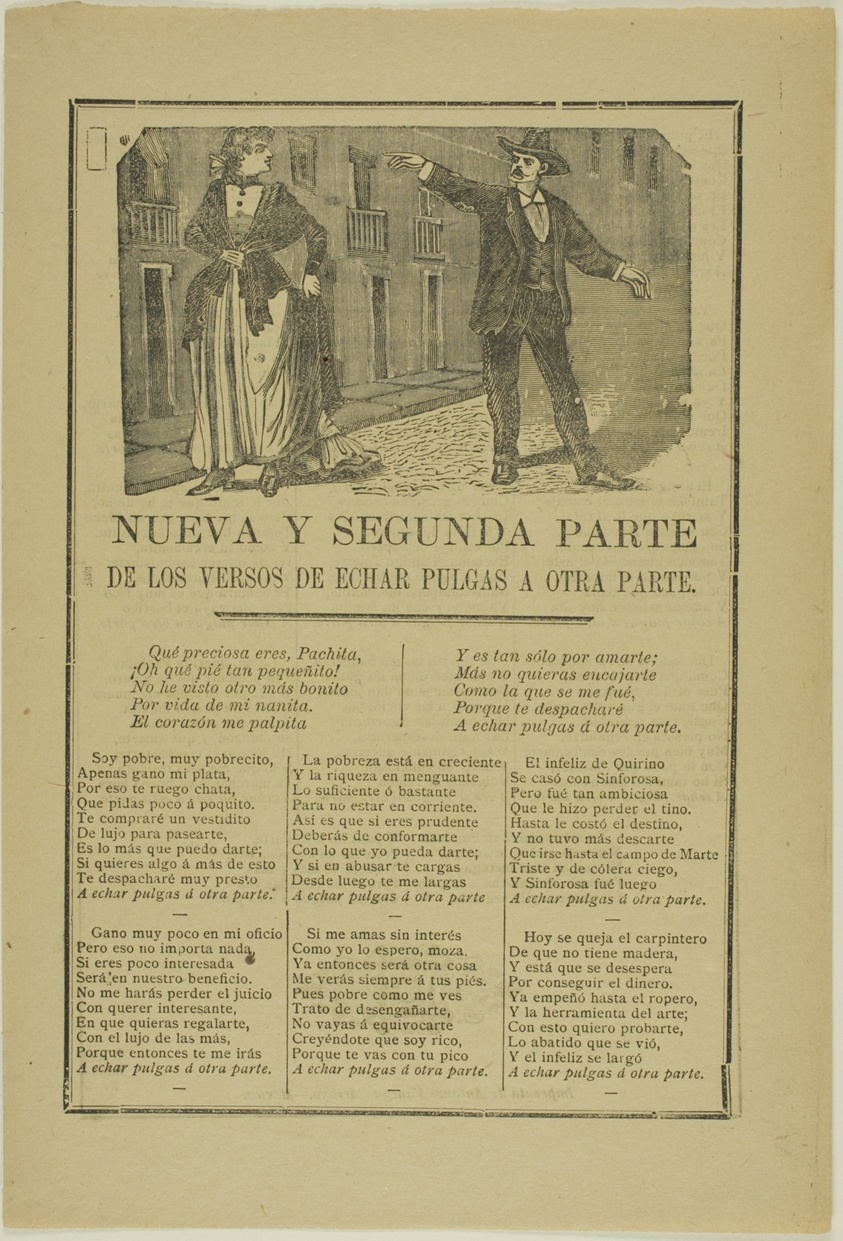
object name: Print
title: First and Second Part of the Verses...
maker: José Guadalupe Posada (Mexican, 1852-1913)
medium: Lithograph on paper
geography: Mexico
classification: lithograph; print; prints and drawing